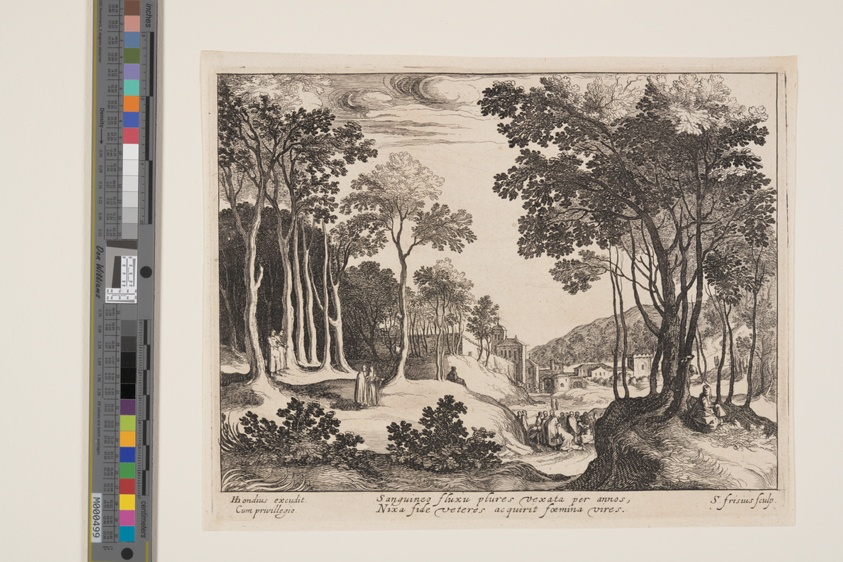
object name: Print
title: Christ Healing the Bloody Woman, from Landscapes with Scenes from the Life of Christ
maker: Simon Frisius (Dutch, c. 1580–1629)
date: c. 1600-1620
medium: Etching on ivory laid paper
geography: Netherlands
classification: etching; paper; print; prints and drawing